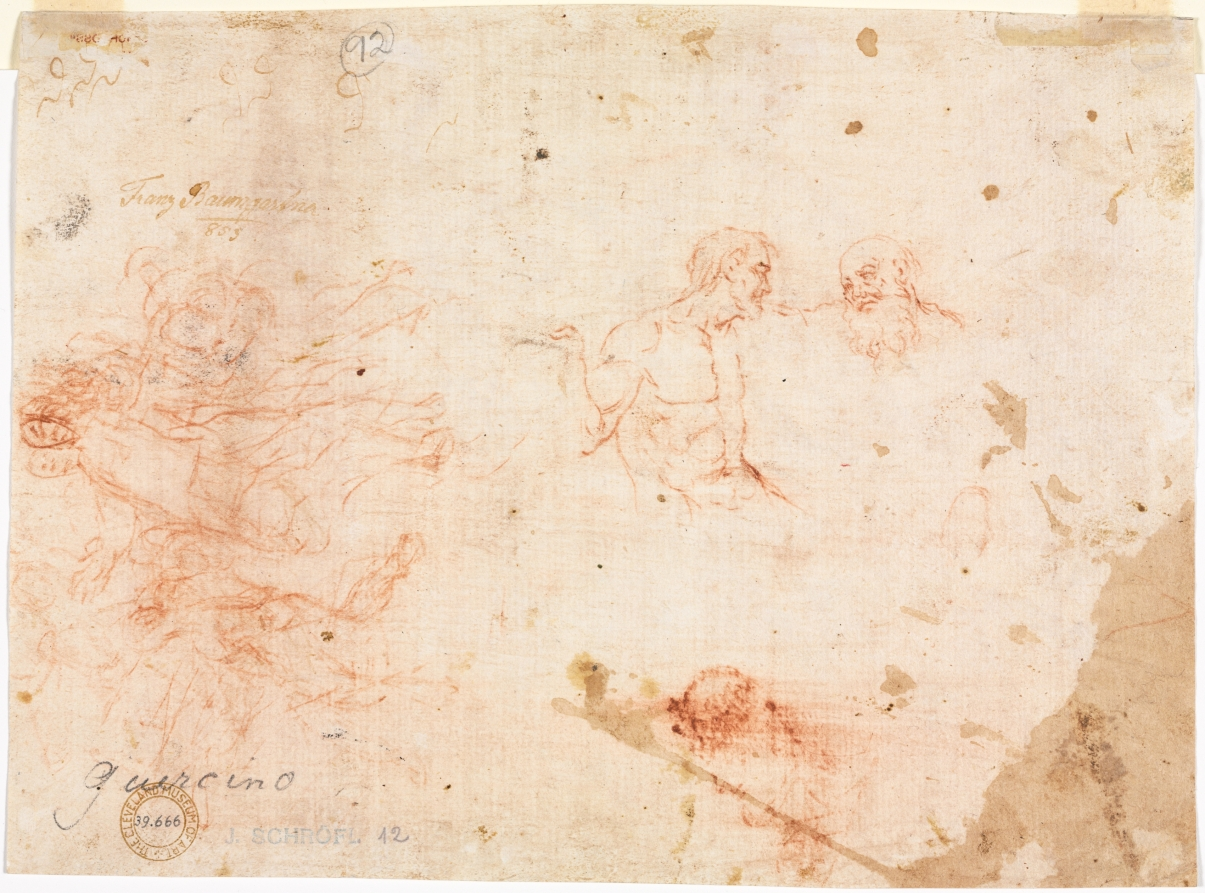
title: Sketch of Two Men and Other Various Figures (verso)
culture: Italy, Bologna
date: 1600s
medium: red chalk (traces of pen and brown ink unrelated to composition)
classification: Drawing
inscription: upper left, offset from old label, in red ink: SS[illegible] [all backwards]; upper left, in graphite: 92 [circled] ; lower left, in graphite: guercino ; lower left, in graphite: 12